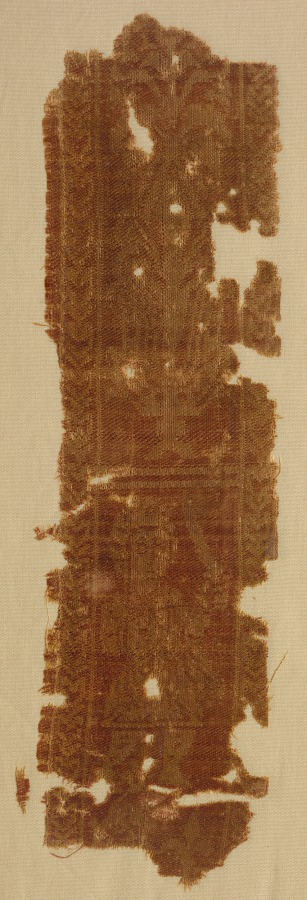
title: Fragment of Decorative Band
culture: Egypt or Syria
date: before 1968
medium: silk: compound twill weave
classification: Textile